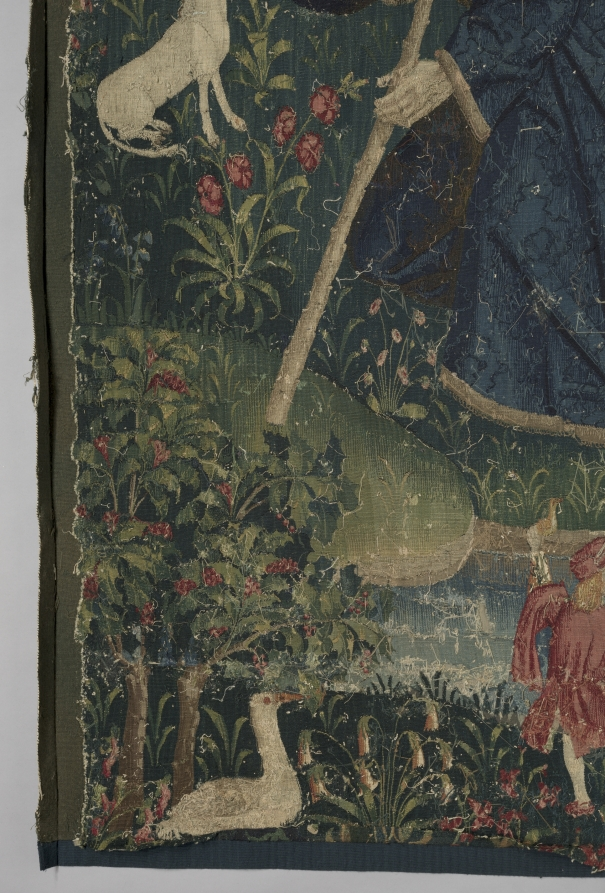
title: Time (from Chateau de Chaumont set)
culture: France, Lyon(?), early 16th century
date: 1512–15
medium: silk and wool; tapestry weave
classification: Tapestry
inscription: French verse in Gothic letters translates as follows: "One sees the weather adorned in green, Sometimes as pleasing as an angel; To suddenly change and be quite strange, The weather never stays the same."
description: Pierre Sala, who likely commissioned the set, is portrayed as the richly attired central figure offering a bouquet, a symbol of knowledge, to Éléonore, his daughter. Éléonore is pregnant, revealed by her upturned skirt and the persimmon in her husband Hector’s hand. Hector’s mother, Marguerite, in dark attire, will wed the widowed Sala in 1519. They appear in front of the royal chateau of Blois. The figures at the right convey Sala’s advice to his children. Time (the old man with the staff) with Clio, the Muse of History, standing on his shoulders, is being attacked by a Herculean youth wielding a stick. With this allegory, Sala is explaining that youth is ignorant of the complexities of life and time. The small unicorn at the far right represents the soul. The verse in Old French at the top refers to changing time: One sees Time adorned with green foliage, Sometimes as pleasant as an angel, Then suddenly change and become quite strange. Never does Time persist in one state.